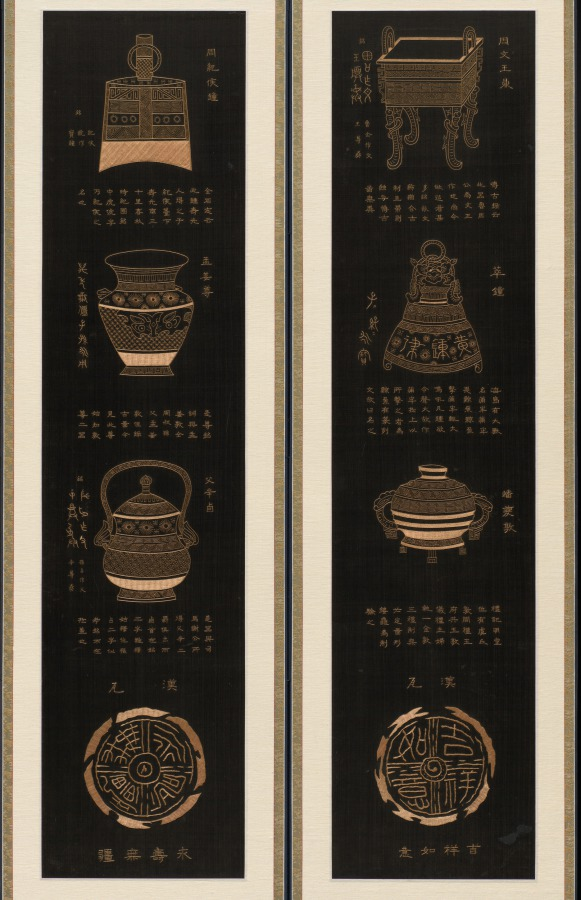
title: Ancient Chinese Bronzes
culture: Korea, Joseon dynasty (1392–1910)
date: late 1800s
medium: Ten-panel folding screen; embroidery, gold silk threads on black silk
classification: Textile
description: This embroidered folding screen depicts a set of bronze vessels. While the subject of bronze vessels is part of mainstream male elite culture, which centered on ancestral rituals, the written text that accompanies each bronze vessel expresses the idea of evoking good fortune and wishing for many children. The is perhaps related to the idea that those who diligently perform rituals for the spirit of ancestors could have all their aspirations realized.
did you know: The written text that accompanies each bronze vessel depicted in this embroidered screen expresses the idea of evoking good fortune and wishing for many children.